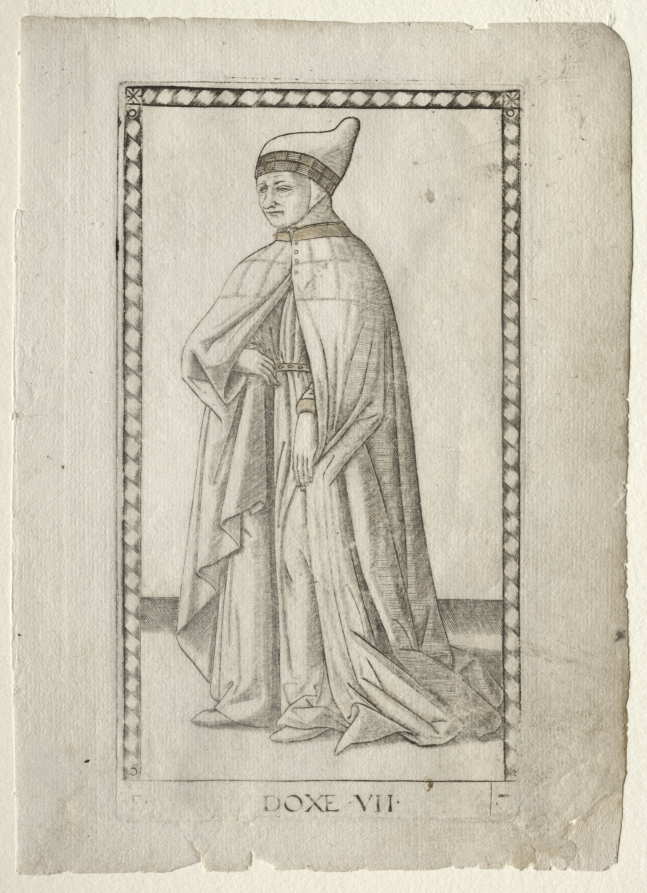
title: The Doge (from the Tarocchi, series E: Conditions of Man, #7)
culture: Italy, Ferrara, 15th century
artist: Master of the E-Series Tarocchi (Italian, active 1460s)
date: before 1467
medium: engraving hand-colored with gold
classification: Print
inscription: Lettered below the image of Doxe (The Doge): ·E· / DOXE·VII· / ·[7]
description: This engraving is part of the Tarocchi group marked with the letter “E,” and named Conditions of Man. This series outlines the social and hierarchical order of ten characters (Beggar, Servant, Artisan, Merchant, Gentleman, Knight, Doge King, Emperor, and Pope), starting from the lower grade and ending with the most important one. Here, Doxe (The Doge) is shown as a full-length male figure, turned to the left. Clasped in a long cloak, the Doge wears his distinctive pointed hat, called zoggia.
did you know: The Doge was the titular head of government in Venice, and corresponded to the duke or the marquis in other parts of Italy. The Doge represented the potentate closest in power and position to a king. In the Tarocchi set the Doge is placed below the engraving displaying the King.